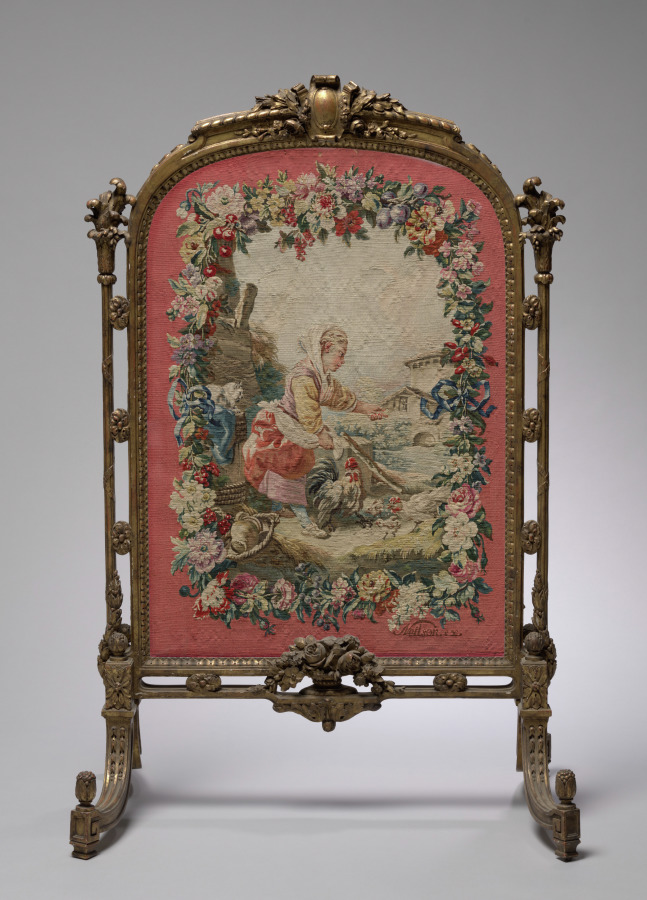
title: Fire Screen Panel and Frame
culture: France, 18th century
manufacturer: Gobelins Manufactory (France, Paris, est. 1662)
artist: after a design by Jean-Baptiste Marie Hüet (French, 1745–1811)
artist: after a design by Maurice Jacques (French, 1712–1784)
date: c. 1775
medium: tapestry weave: silk and wool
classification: Textile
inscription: lower right: "Neilson. ex.."